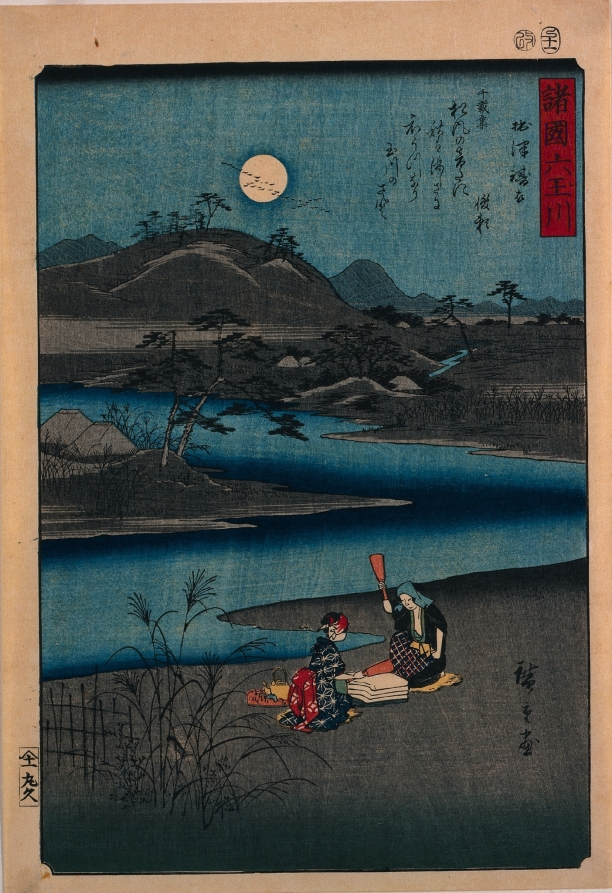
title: Cloth Fulling Jewel River in Settsu, from the series Six Jewel Rivers of the Various Provinces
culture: Japan, Edo period (1615–1868)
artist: Utagawa Hiroshige (Japanese, 1797–1858)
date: 1857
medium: Color woodblock print, ink and color on paper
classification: Print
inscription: Signature: Hiroshige ga. Publisher: Maruya Kyushiro (Marukyu, emblem). Censorship Seal: aratame.